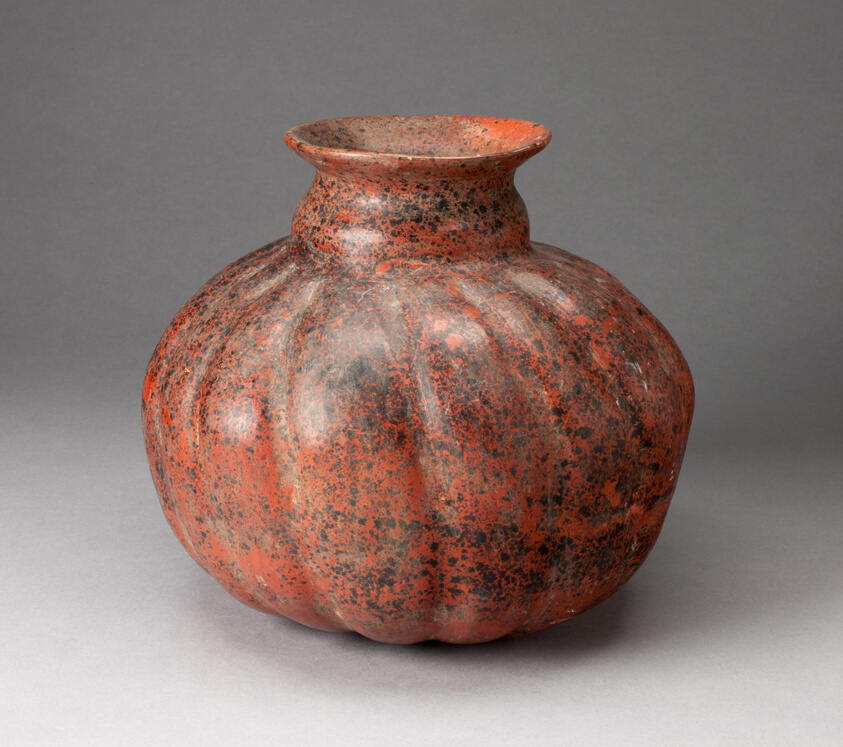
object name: Vessel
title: Fluted Vessel, Possibly in the Form of a Gourd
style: colima, mesoamerican, Pre-Columbian, americas, Arts of the Americas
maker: Colima (Colima, Mexico)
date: c. 200 CE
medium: Ceramic and pigment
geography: Colima state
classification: earthenware; ceramics; vessel; art of the americas